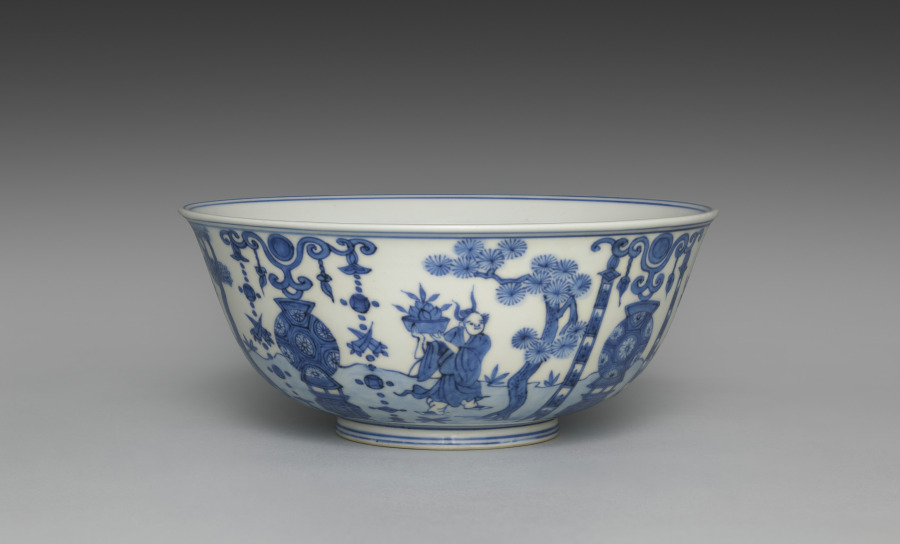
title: Bowl from Nesting Bowls with Daoist Immortals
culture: Japan, Meiji period (1868–1912)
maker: Seifū Yohei III (Japanese, 1851–1914)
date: 1893–1914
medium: Inner bowl from a set of three bowls; porcelain with underglaze blue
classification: Ceramic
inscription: 大日本清風造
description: Yohei III was capable of ink painting–like compositions in underglaze blue, as well as more decorative ones like that on this set of three nesting bowls. Bowls with very similar designs in five colors were produced in the reign of the Wanli emperor (reigned 1572–1620) during the Ming dynasty, and Yohei must have had direct access to one of these or to a close copy. A scene of Daoist immortals is presented on the bowls. On each one, the ground plane is defined with a blue wash. Four lanterns are evenly spaced around the bowl. Two are flanked with linked-piece metalwork banners of the seven treasures. The alternate altars are adorned with textile banners. In between them are four immortals, each standing beneath a tree with small plants surrounding his feet. Two of the immortals hold fruit on a tray. Another carries an elixir-filled ewer and a willow branch. The fourth holds a swastika (manji), here an auspicious symbol, and a flower. Curiously, the inscription inside each footring reads “Made by Seifu of Great Japan,” in emulation of the dynasty and reign inscriptions that appear on Chinese ceramics; however, one can also see through the translucent glaze another inscription, “Seifu Yohei,” written in large characters within a double band of blue on the largest bowl.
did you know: In the bottom of each bowl is a scene of two robed immortals who appear to stand on a precipice in a mountainous landscape high in the clouds, with celestial orbs over their heads.